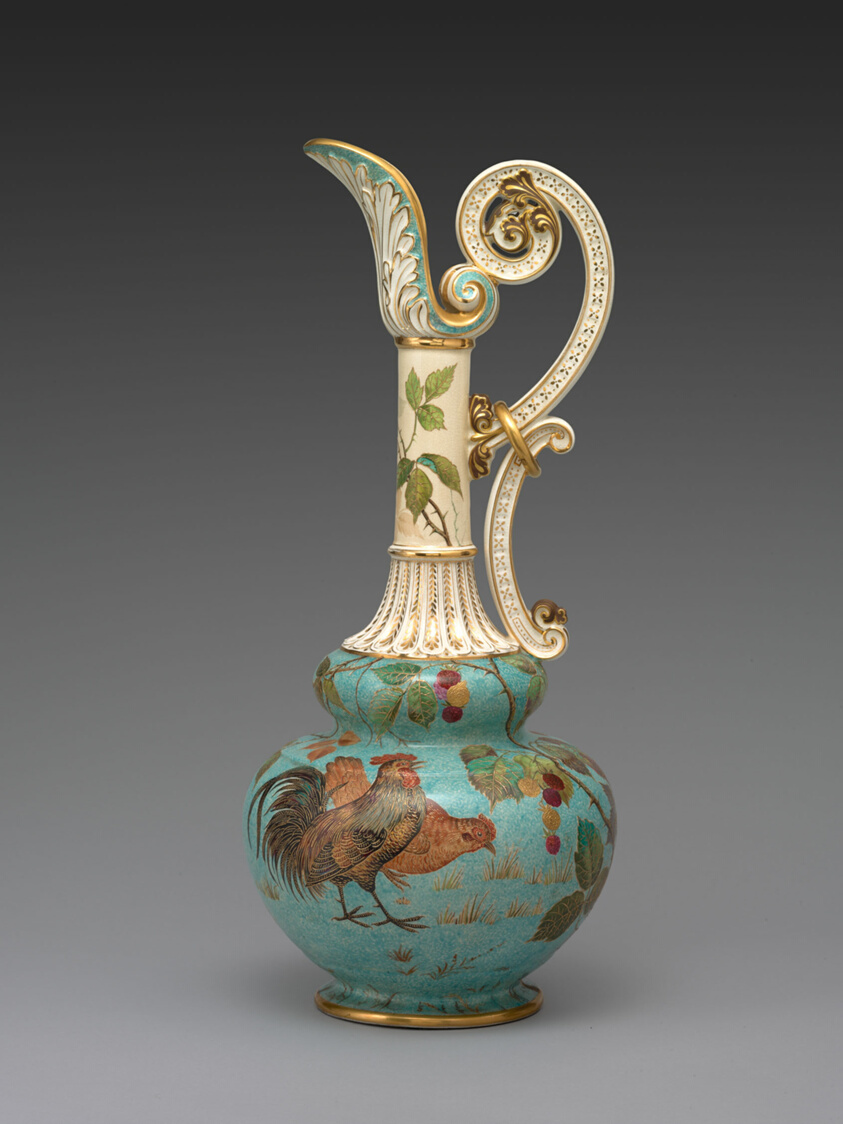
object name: Ceramics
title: Ewer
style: Aesthetic Movement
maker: Edward Lycett (American, born England, 1833–1910); Faience Manufacturing Company (American, 1881–1892); Brooklyn, New York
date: 1886–90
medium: Earthenware with glazes and gilding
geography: Brooklyn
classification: vessel; earthenware; ewer (vessel); american decorative arts; pottery; ceramics; decorative arts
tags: animals, vines, bushes, Chicken, roosters